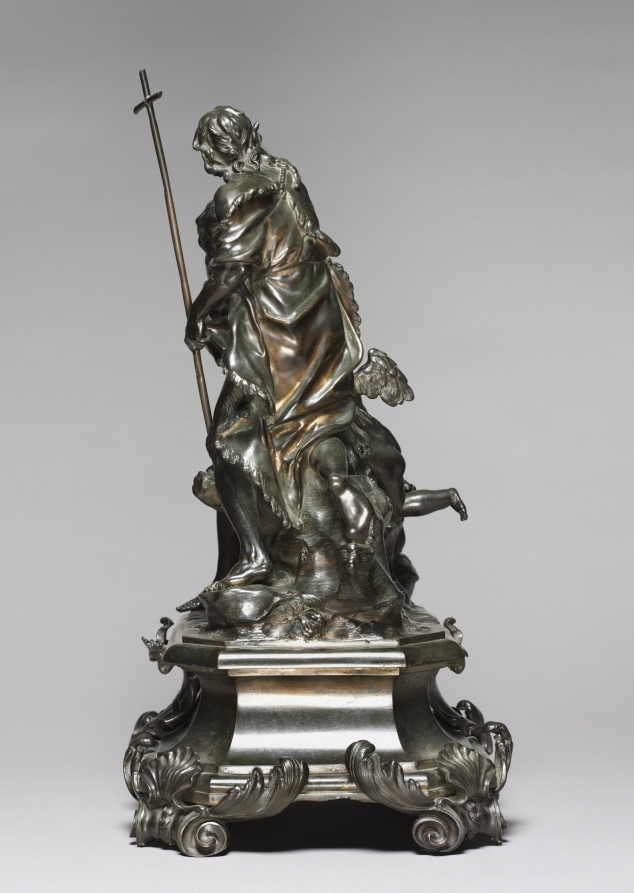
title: Baptism of Christ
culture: Italy, 17th century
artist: Alessandro Algardi (Italian, 1598–1654)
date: designed 1645–46, probably made 1650–55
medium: bronze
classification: Sculpture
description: When Innocent X (Giovanni Battista Pamphili, ruled 1644–55) became pope, Alessandro Algardi endeavored to obtain his patronage. This bronze Baptism of Christ is a casting from the molds used for an original silver sculpture that Algardi presented to the new pope to gain his support in 1646. The composition depicts an important scene in the life of Christ. On the right is John the Baptist, who pours water onto Jesus's head from a shell. As Christ bows his head to be baptized, a little angel holds the edge of his cloak. Algardi worked carefully to make this piece exciting from a number of points of view. Its dramatic emphasis shifts, depending on the viewer's vantage point.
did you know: Algardi's sculpture plays on its intended recipient's given name: Giovanni Battista (John the Baptist).